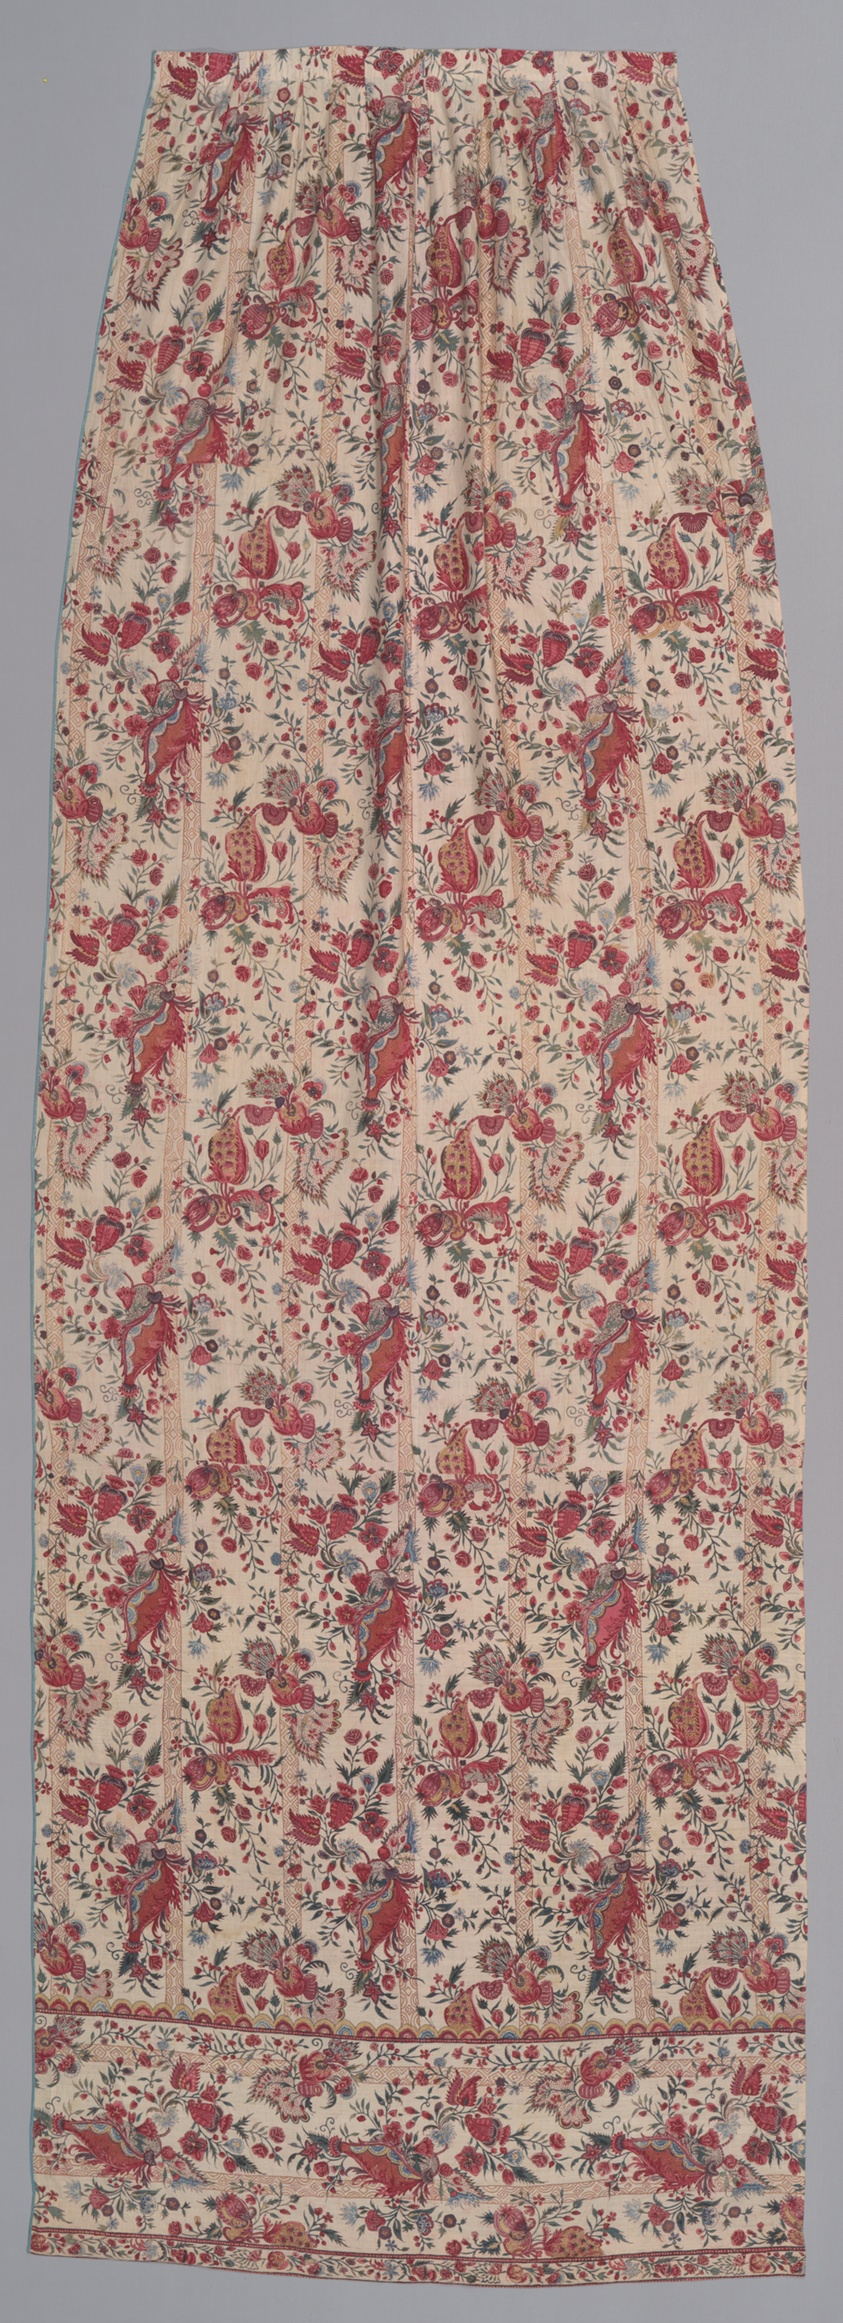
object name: Coverings and Hangings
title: Chintz Curtain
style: 18th Century, chintz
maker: Indian export for European market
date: First quarter 18th century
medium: Cotton, plain weave; painted and resist-dyed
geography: India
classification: weaving; textile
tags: botanical/floral, abstract objects, diamond shapes, floral motifs, flowers